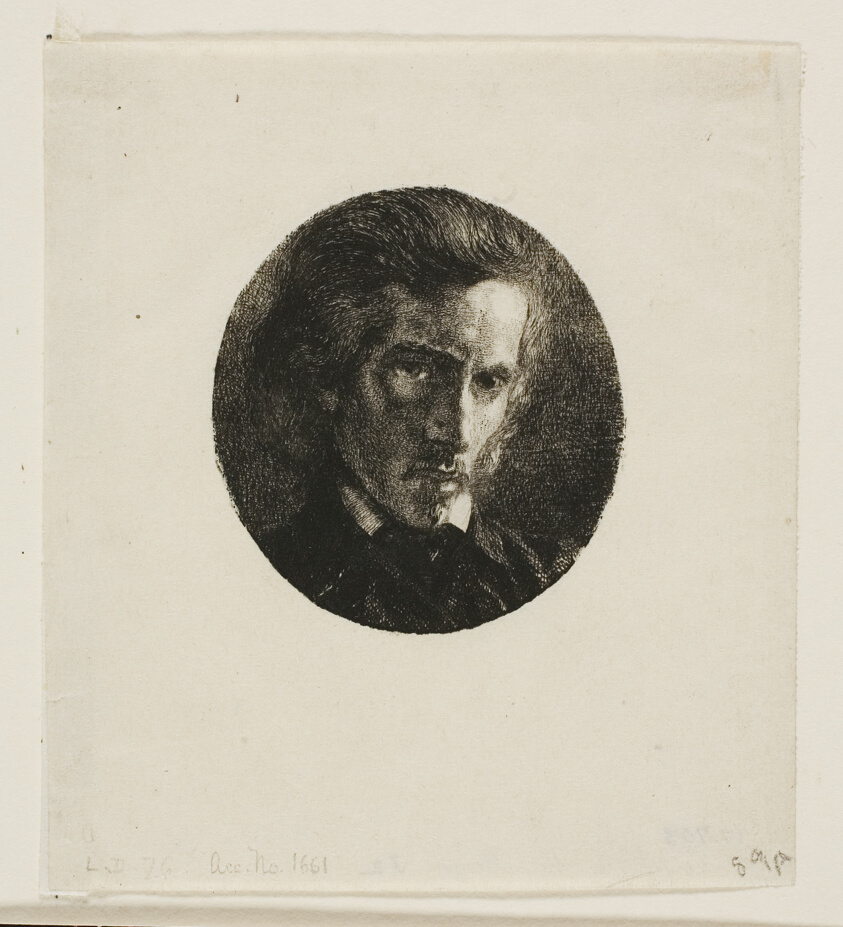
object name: Print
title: Portrait of Edmond de Courtives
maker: Charles Meryon (French, 1821-1868)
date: c. 1849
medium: Etching in black on ivory wove paper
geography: France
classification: etching; print; prints and drawing